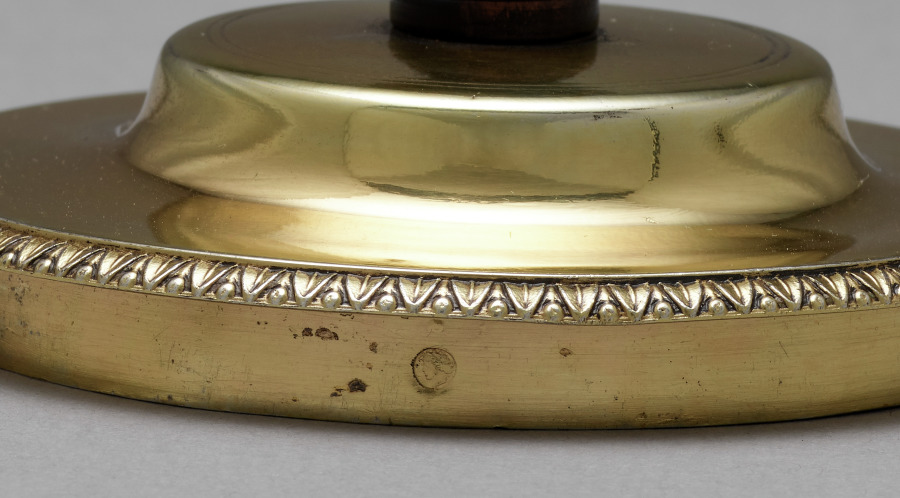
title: Cover for a Chocolate Pot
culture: France, 19th century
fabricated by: Sixte-Simon Rion (French)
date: c. 1830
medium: silver, wooden handle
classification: Silver